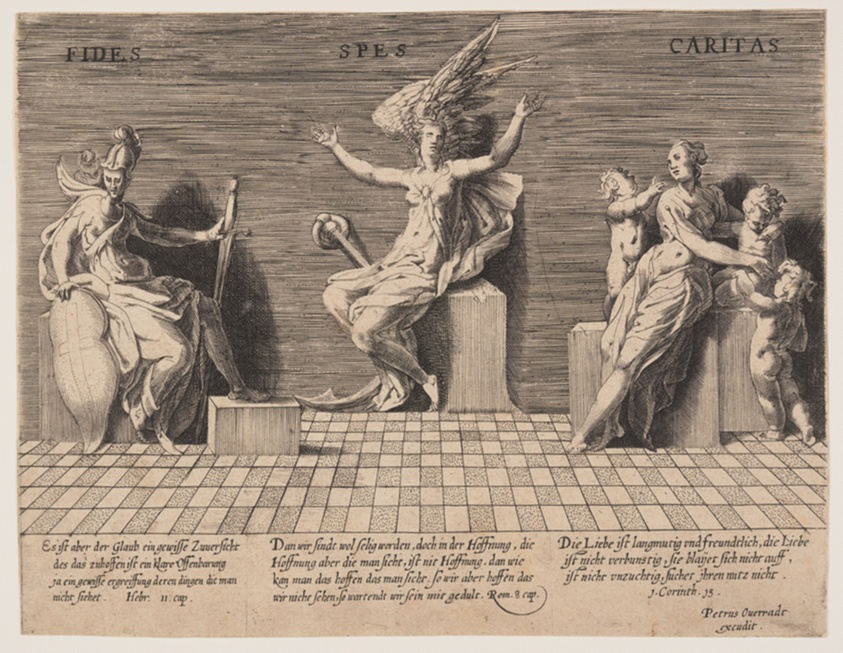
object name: Print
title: The Theological Virtues: Faith, Hope, and Charity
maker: After Adriaan de Weerdt; Flemish, c. 1510-c. 1590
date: c. 1600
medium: Engraving on laid paper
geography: Flanders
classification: engraving; paper; print; prints and drawing